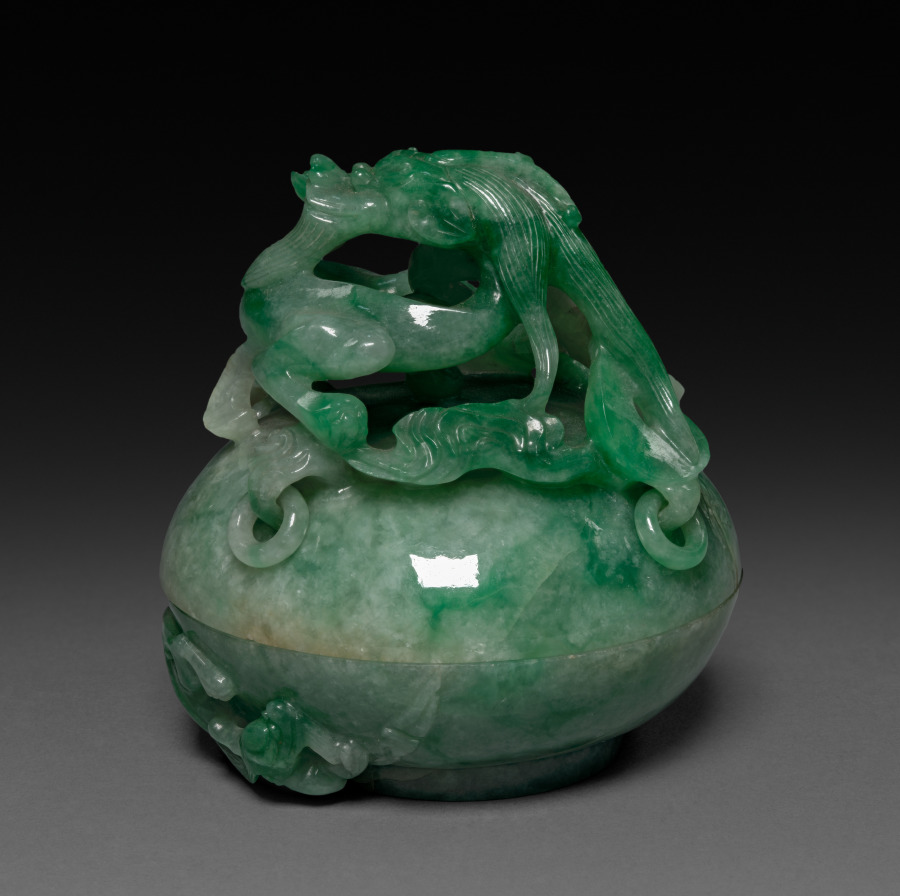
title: Three-Sectional Altar Group: Small Bowl with Carved Dragon with Lid and Base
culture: China, Qing dynasty (1644-1911)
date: 1644–1911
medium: jade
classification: Jade